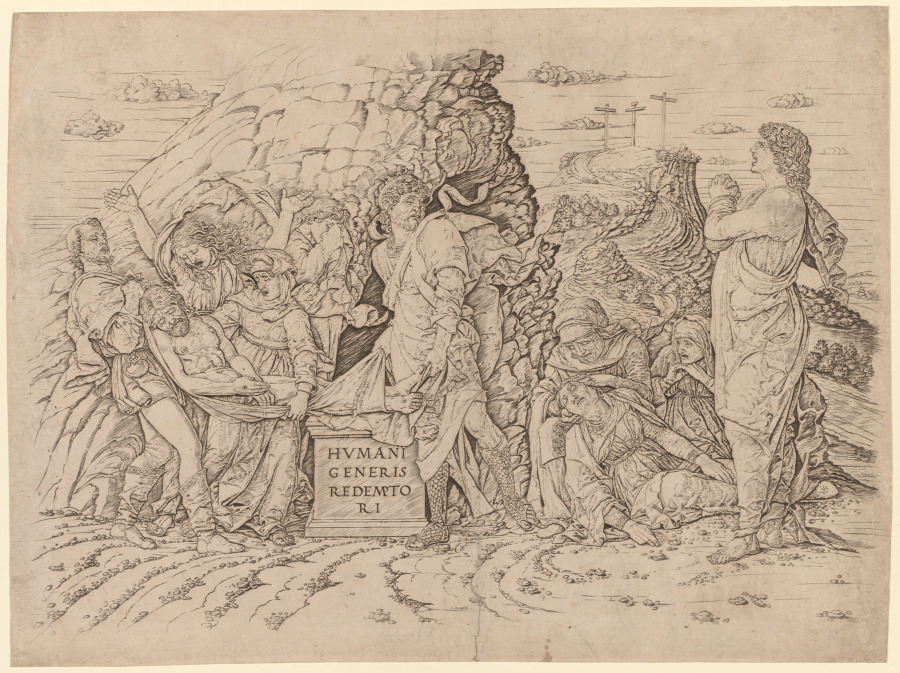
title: The Entombment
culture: Italy, 15th century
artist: Andrea Mantegna (Italian, about 1431–1506)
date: c. 1465–70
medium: engraving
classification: Print